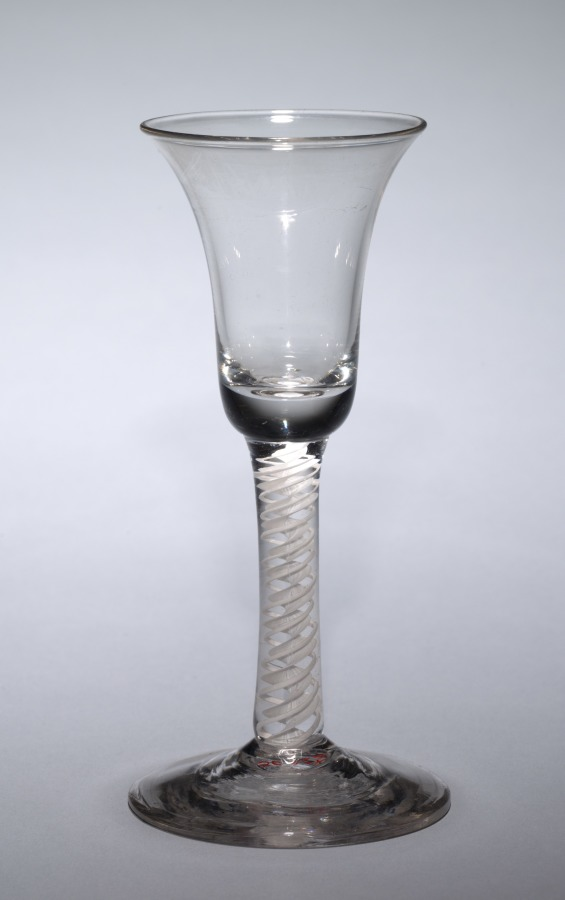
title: Wine Glass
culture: England, 18th century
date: 1750–1799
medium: glass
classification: Glass